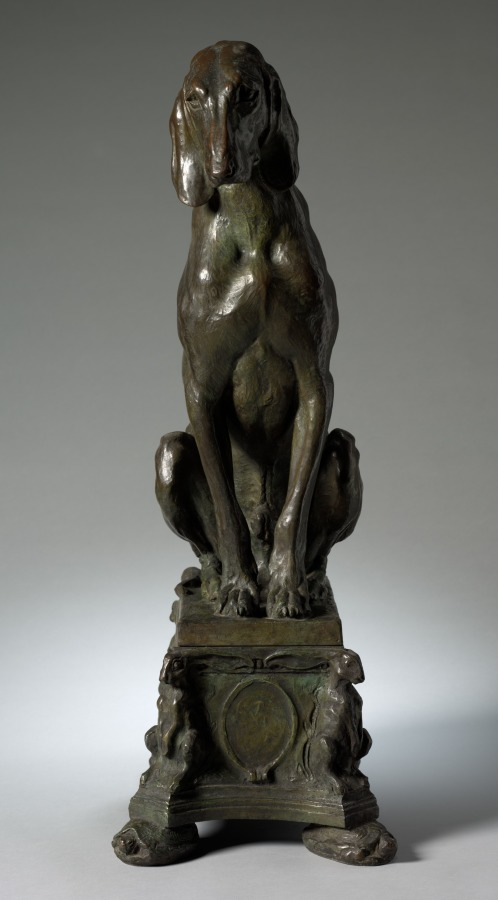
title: Hound (1 of 2)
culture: America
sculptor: Charles Cary Rumsey (American, 1879–1922)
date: 1912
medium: bronze andiron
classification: Sculpture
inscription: Signed on plinth: © C. C. Rumsey